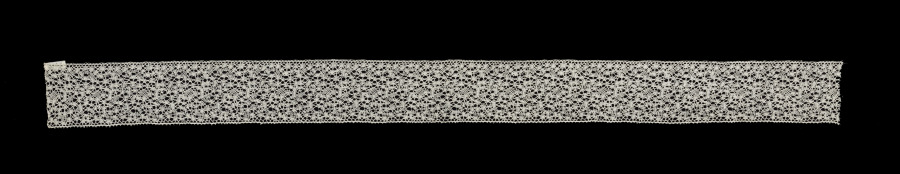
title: Lace Insertion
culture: Belgium, Binche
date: 1700s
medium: Bobbin lace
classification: Lace